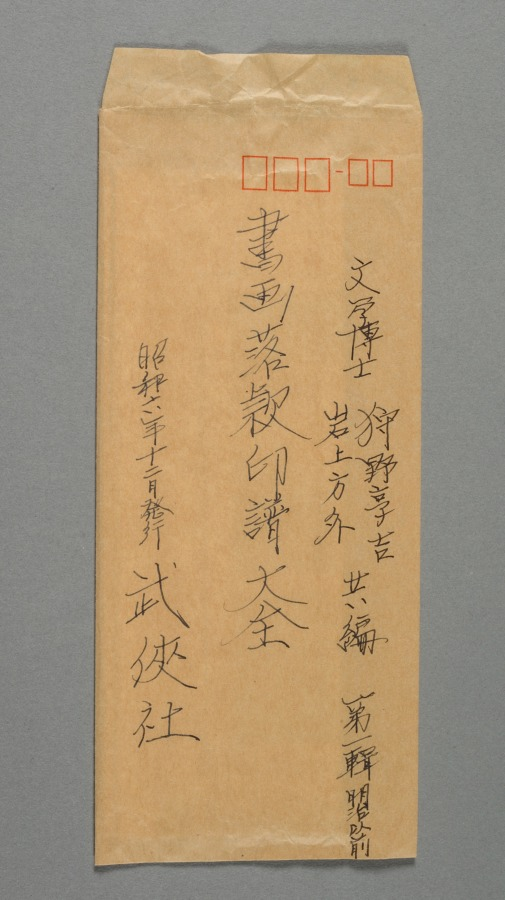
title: Landscape with Gentle Peaks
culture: Japan, Edo period (1615–1868)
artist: Kan Tenju (Japanese, 1727–1795)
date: 1767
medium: hanging scroll; ink and light color on paper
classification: Painting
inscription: 雨過嵐光煙／雲陽樹影諫／夕陽独在左／？卷讀残書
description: A figure sits in a retreat tucked into the mountains near a waterfall. The painter, Kan Tenju, was best known as a calligrapher and seal carver. Of Korean heritage, he was a patron of artist Ike Taiga (池大雅) (1723–1776), and a cousin of Taiga’s student Aoki Shukuya (青木 夙夜) (died 1802). His Chinese-style poem reads as follows: Smoky mist in the mountain reflects light after the rain, Sunlight passes through the clouds to cast shadows of the trees, Alone in the sunset, I read a well-worn book.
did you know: This painting combines image and calligraphy, connected by skillful brushwork.